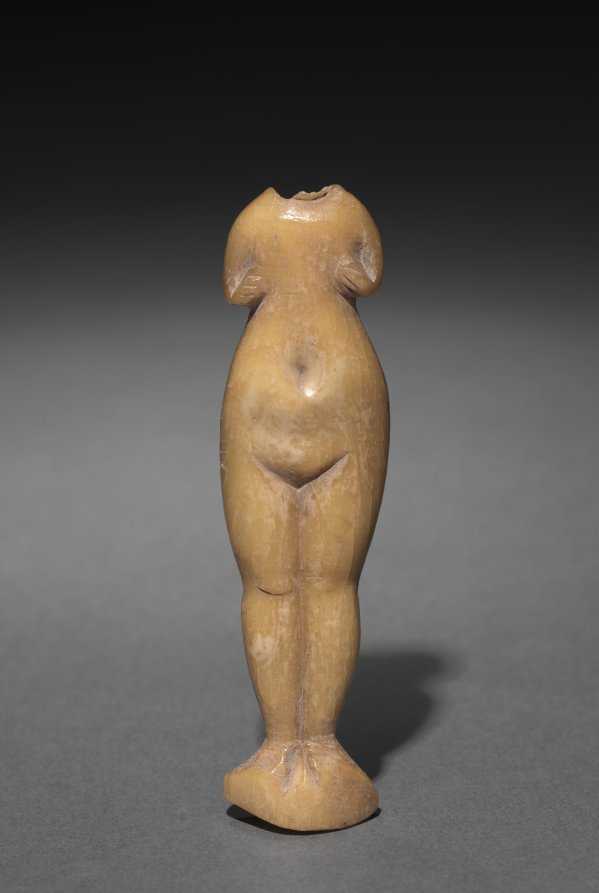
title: Figurine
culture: Parthian Empire (247 BCE–224 CE)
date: 1–200 CE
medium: bone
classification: Sculpture